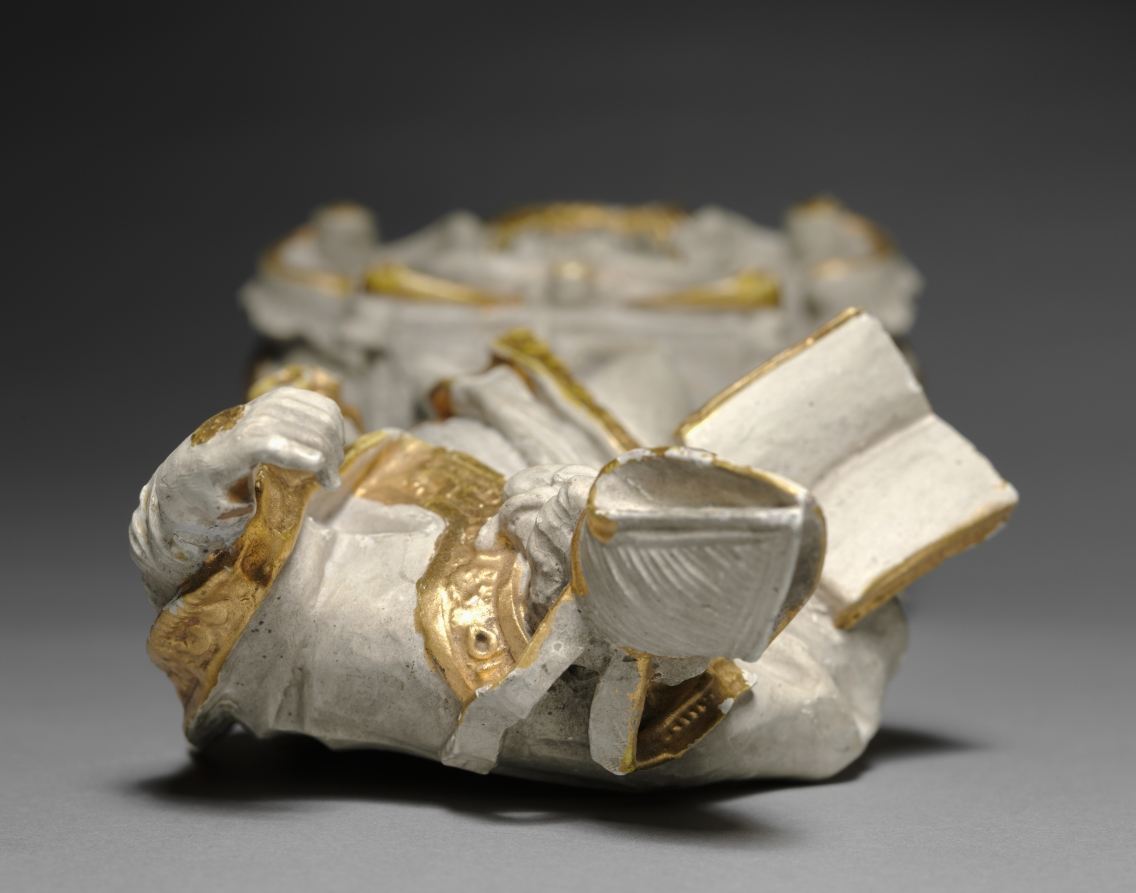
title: Bishop Saint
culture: Germany, 18th century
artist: attributed to Ferdinand Tietz (Austrian, 1708–1777)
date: c. 1740–1750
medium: painted and gilded wood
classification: Sculpture